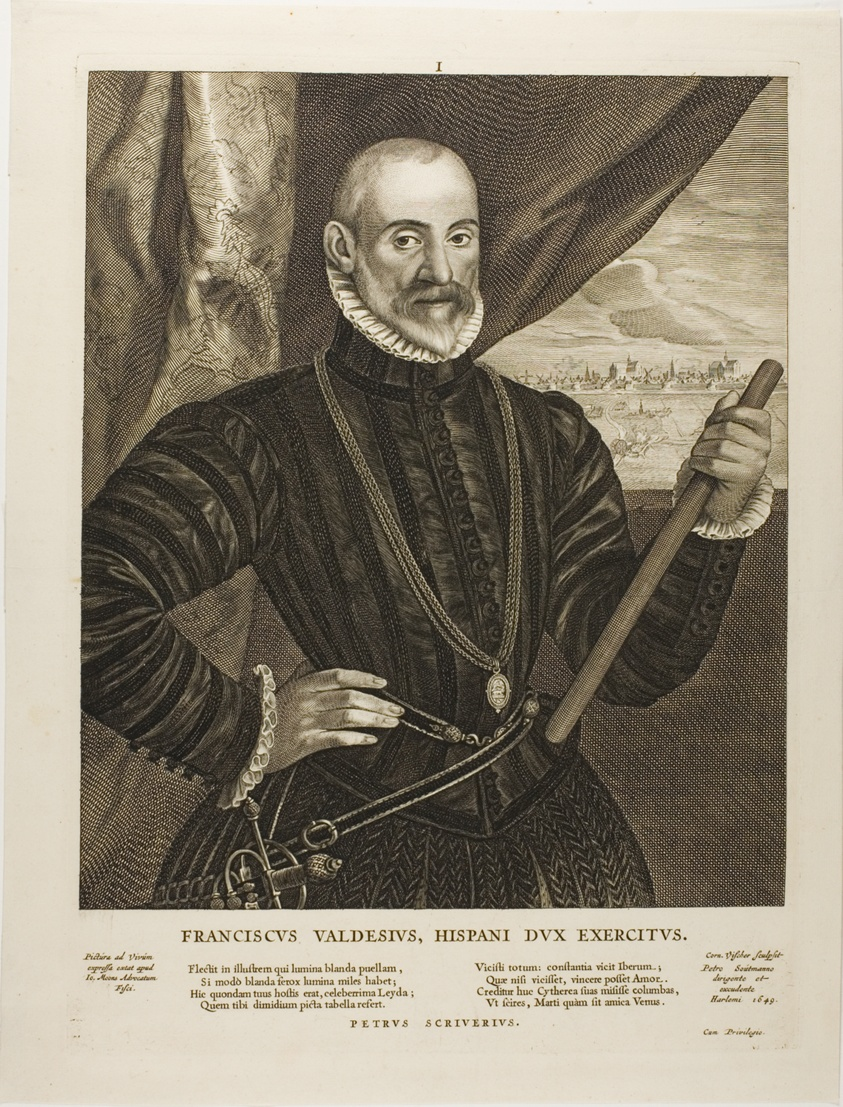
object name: Print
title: Francisco Valdes, Spanish commander, plate 1 from Quatuor Personae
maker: Cornelis Visscher (Dutch, c. 1629-1658)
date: 1649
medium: Engraving on paper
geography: Holland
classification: engraving; print; prints and drawing